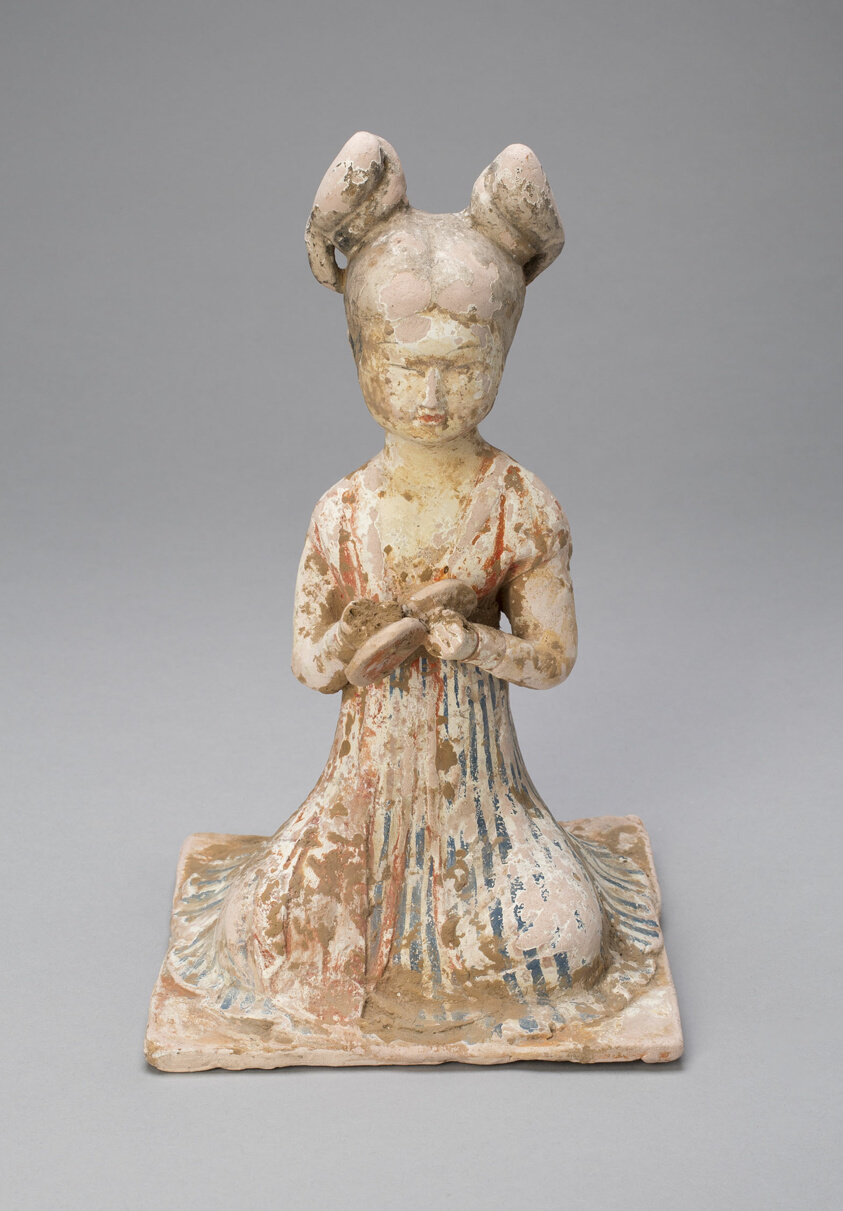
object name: Sculpture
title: Female Musician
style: Chinese (culture or style)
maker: China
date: Tang dynasty (A.D. 618–907), late 7th/early 8th century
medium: Earthenware with polychrome pigments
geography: China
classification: statuette; sculpture